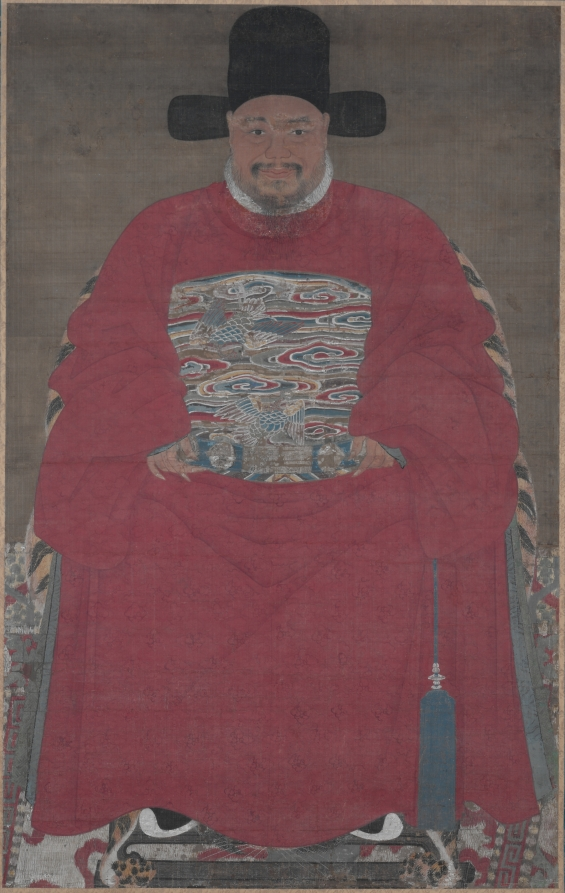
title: Portrait of an Official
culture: China, Ming dynasty (1368-1644) - Qing dynasty (1644-1911)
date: 1600s–1700s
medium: hanging scroll; ink and color on silk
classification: Painting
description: This official's portrait was done in the portrait painting style of the Ming dynasty.